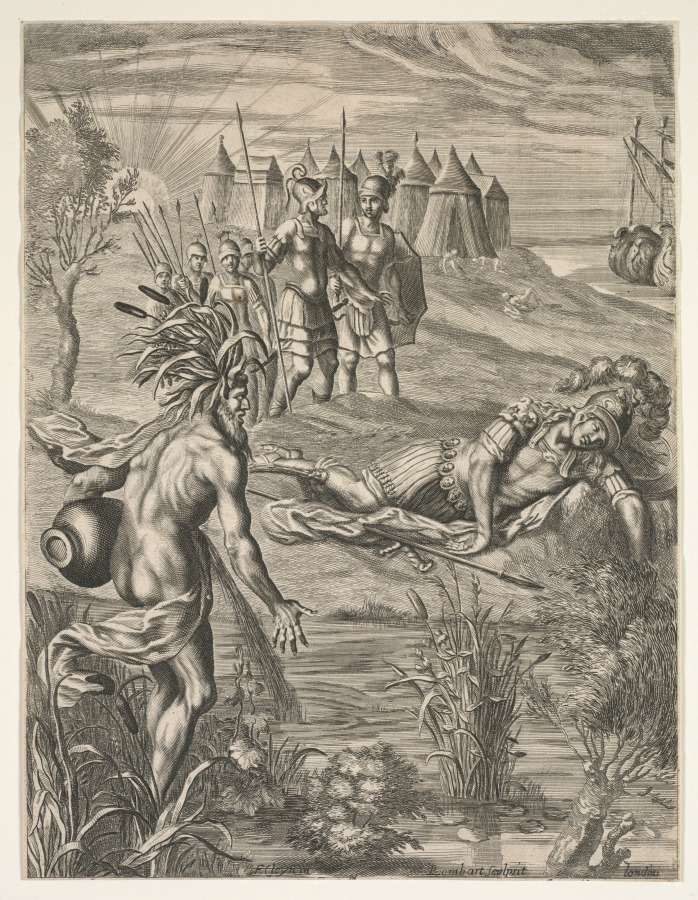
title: Aeneid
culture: France, 17th century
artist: Pierre Lombart (French, 1612–1682)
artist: after Francis Cleyn (German, 1582–1658)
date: 1658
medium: engraving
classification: Print